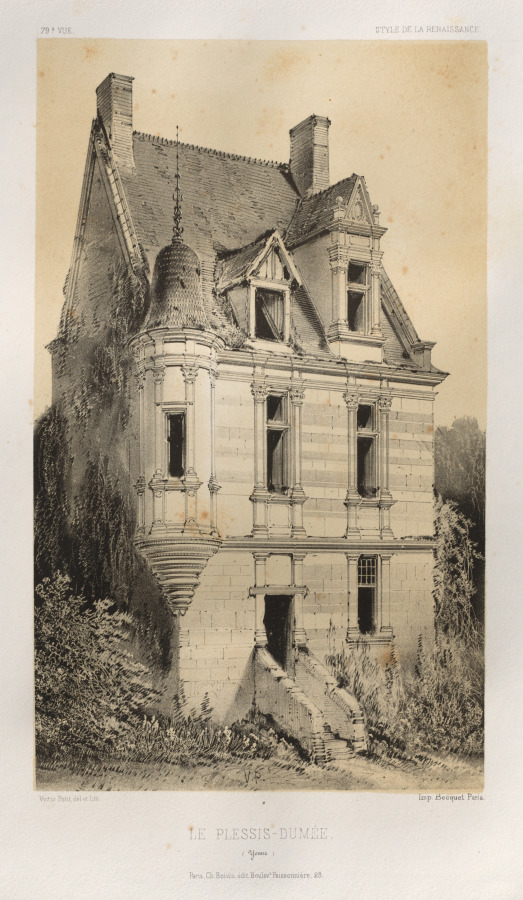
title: Architecture Pittoresque ou Monuments des XVeme. Et XVIeme. Siecles: Chateaux de France des XV et XVI Siecles: Pl. 79, Le Plessis-Dumée (Yonne)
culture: France, 19th century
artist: Victor Petit (French, 1817–1874)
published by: Charles Boivin (publisher and editor); Lith de Godard a Paris (printer)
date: 1860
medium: lithograph with tint stone, from portfolio of 100 lithographs with tint stone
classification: Print